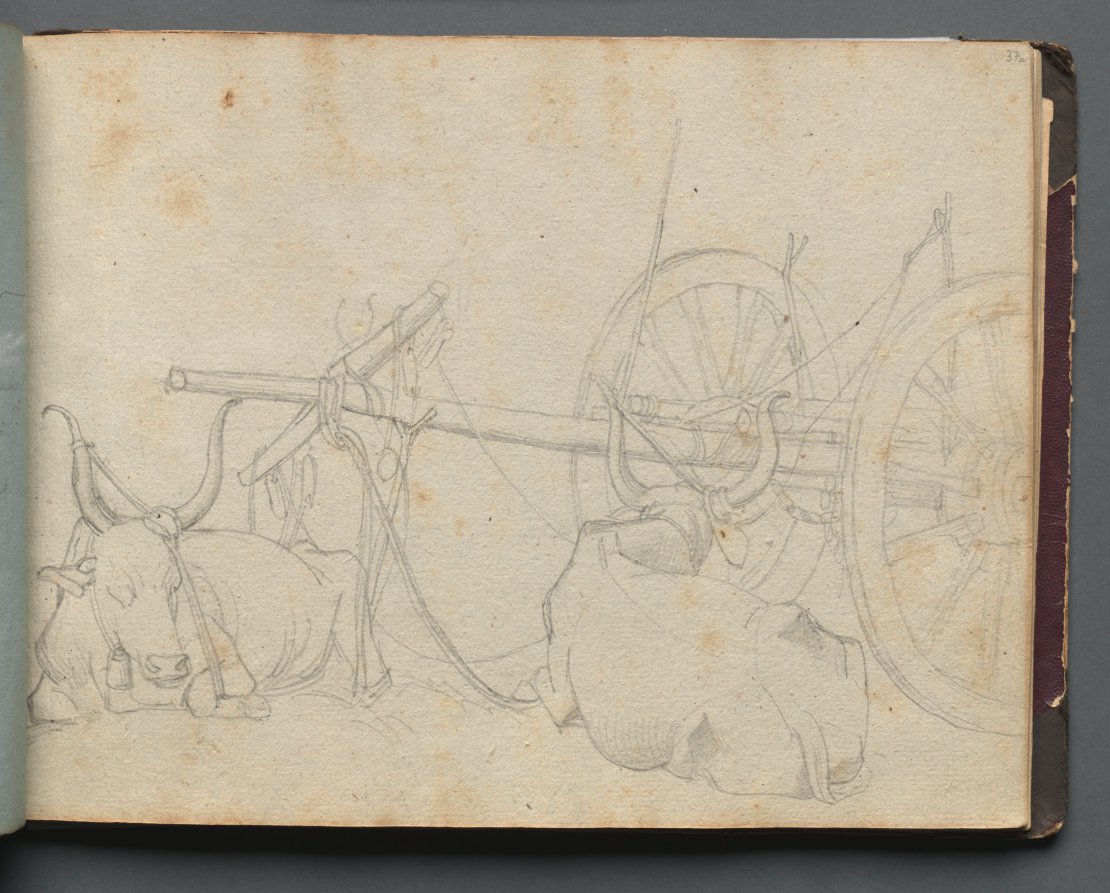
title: Album with Views of Rome and Surroundings, Landscape Studies, page 37a: Oxen and Wagon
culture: Germany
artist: Franz Johann Heinrich Nadorp (German, 1794–1876)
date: c. 1830s-70s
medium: graphite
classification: Bound Volume